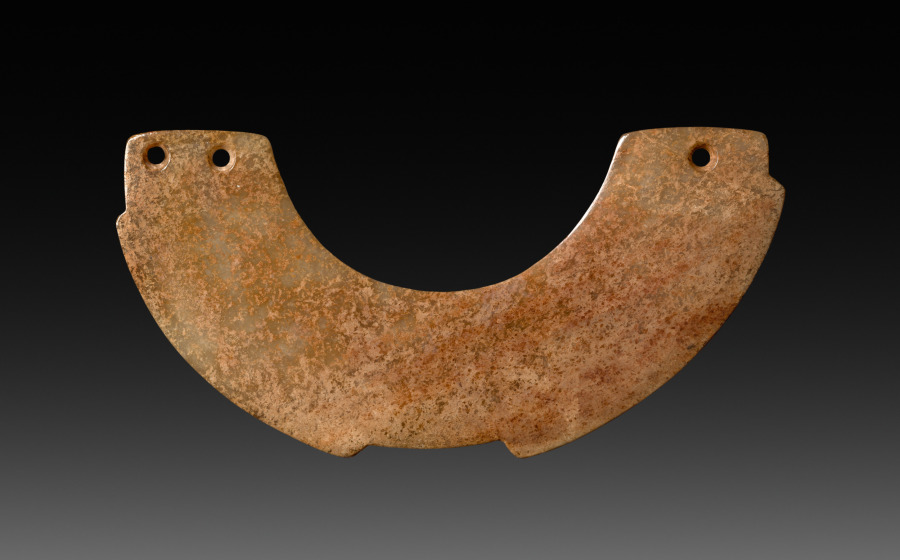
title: Semi-Circle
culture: China, Zhou dynasty (c. 1046–256 BCE)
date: 1045–256 BCE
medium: jade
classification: Jade